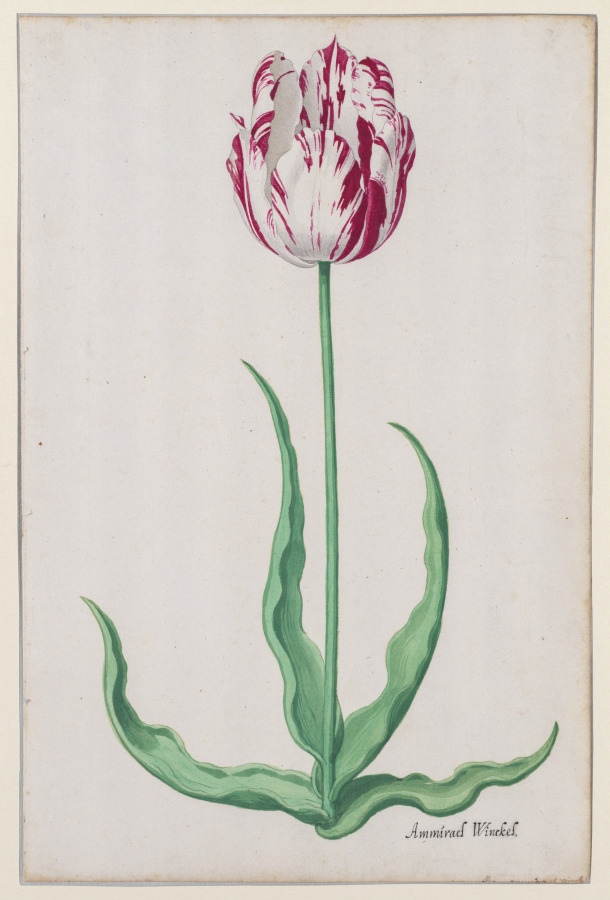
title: Study of a Tulip (Ammirael Winckel)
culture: Netherlands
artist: Pieter Holsteyn II (Dutch, c.1612–1673)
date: c. 1645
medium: brush and watercolors in crimson, grey and green over traces of charcoal on antique laid paper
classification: Drawing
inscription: Recto, Ammirael Winckel. in black ink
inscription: Bottom border, cut off, Ammirael Winck in brown in (different hand)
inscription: Verso: J Morel and 31 and 31 in graphite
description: This image of a tulip was made as part of a tulip book used as a grower’s marketing tool during the so-called tulip mania, a speculative bubble in 17th-century Holland when ten tulip bulbs could cost more than a stately Amsterdam canal house. The striations on the tulip, which were caused by a virus in the bulb, made it especially valuable. Pieter Holsteyn II was one of many artists in the Netherlands at the time who specialized in botanical illustration. This tulip's Dutch name, inscribed on the sheet, translates to "Admiral Winckel." Winckel was the family name of one of the largest growers of tulips in the period.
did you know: In 17th-century Holland, some tulip bulbs were as expensive as a stately Amsterdam canal house!